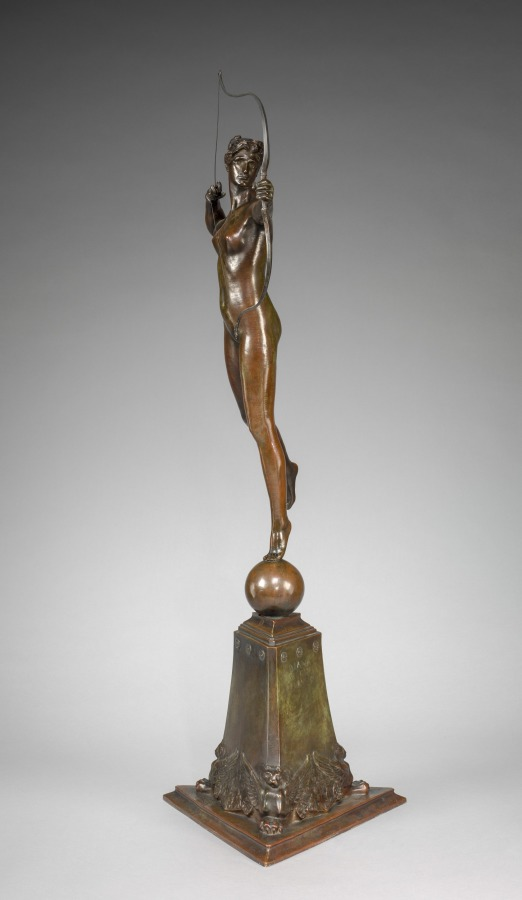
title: Diana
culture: America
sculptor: Augustus Saint-Gaudens (American, born Ireland, 1848–1907)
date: modeled 1899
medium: bronze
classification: Sculpture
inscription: Signed and dated on base: AUGUSTUS SAINT GAUDENS, MDCCCXCIX; inscribed on triangular base: DIANA OF THE TOWER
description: Depicting the Roman goddess of the hunt, Diana is a small version of the massive weathervane Augustus Saint-Gaudens designed for the second iteration of Madison Square Garden in New York, a building that was demolished in 1925. Although controversial for its nudity, the weathervane dominated the city's skyline and became a prominent landmark. Due to its popularity, Saint-Gaudens marketed tabletop versions of the sculpture, which were sold through high-end retailers such as Tiffany and Co.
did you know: The face of Diana was inspired by Davida Johnson Clark, the artist's longtime model, muse, and lover.